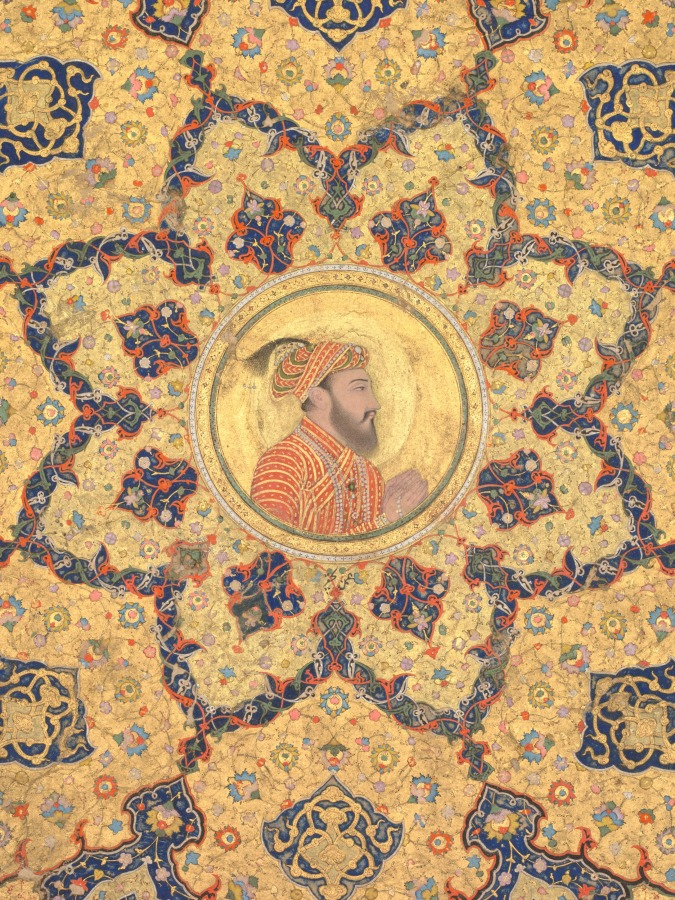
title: Shamsa (sunburst) with portrait of Aurangzeb (1618–1707), from the Emperor's Album (the Kevorkian Album)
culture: India, Mughal court, made for Shah Jahan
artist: probably by Bichitr (Indian, active c. 1615–50)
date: illumination 1640–55; original portrait c. 1640–50; altered after 1658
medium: Gum tempera and gold on paper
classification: Painting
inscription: inscribed below Shamsa: Padshah Jahan; inscribed below portrait : 'amal-i Bichitr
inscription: Persian inscription below shamsa (sunburst), in nasta‘liq script: Great King Shah Jahan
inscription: Persian inscription below portrait, in nasta‘liq script: the work of Bichitr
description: This closing page of an imperial Mughal album originally had the shamsa, or sunburst, with a plain gold disc in the center, referencing the light of God as divine sanction for Emperor Shah Jahan’s rule. The depiction of divine light by means of floral and geometric patterns was painted by hand with mathematical precision in gold and lapis lazuli. The portrait of Aurangzeb was probably added when he took over the imperial library after seizing the throne from his father, Shah Jahan, in 1658 and adopting the name Alamgir, which means “Seizer of the Universe.” The string of prayer beads in his right hand points to his extreme religious orthodoxy, which dramatically altered the culture of the Mughal court from what had previously been an openly ecumenical center.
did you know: Tooling the gold cloud motif with pinpricks makes it catch more light and shimmer.